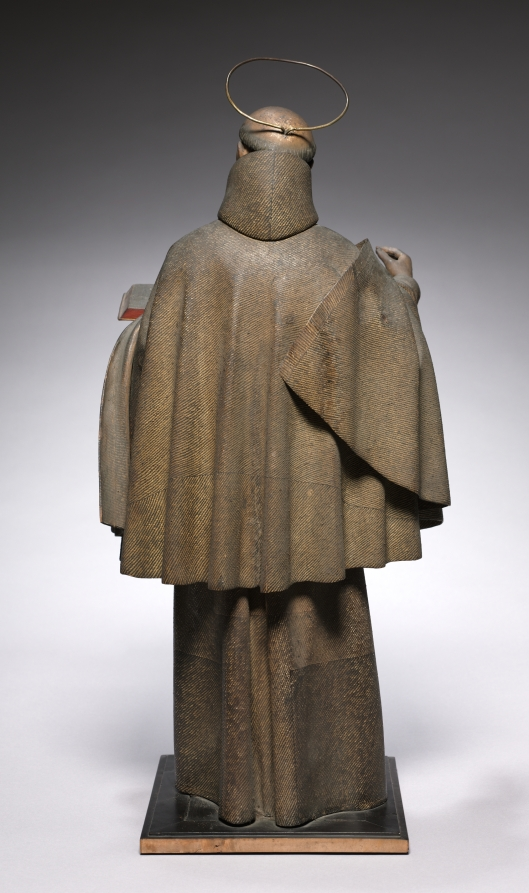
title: Saint Peter of Alcántara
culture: Spain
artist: Pedro de Mena (Spanish, 1628–1688)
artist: and Workshop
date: c. 1663–70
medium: painted wood, with ivory and glass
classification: Sculpture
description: Painted wood sculpture from Spain in the 1600s involved a team of artisans working under a lead sculptor. The sculptor first carved numerous pieces of wood in complex forms. So the paint would stick properly, these fragments were delicately covered in gesso (a combination of white chalk and glue made from animal collagen), preserving the subtle woodcarving underneath. The rough surface of the saint's face—reflecting his age and hardships—came from texturing the gesso with a brush. The glass eyes, probably imported from Venice, were inserted from behind the face before the wood pieces were attached. Finally, the eyelashes were added for a further touch of realism. A painter created the appearance of coarse sackcloth in a distinctive style, with yellow strokes rising off the surface. Smoother brushstrokes form the flesh tones, even revealing the saint's five-o'clock shadow. Unlike other kinds of painting, sculpture from southern Spain at this time was usually not covered in varnish; sculptors prized the unvarnished paint for its realistic effect, although it makes the surface exceptionally delicate and susceptible to dust and dirt, which more easily sticks to the surface.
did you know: Peter of Alcantara was so dedicated to his work he slept only 90 minutes a night--he's the patron saint of night watchmen!